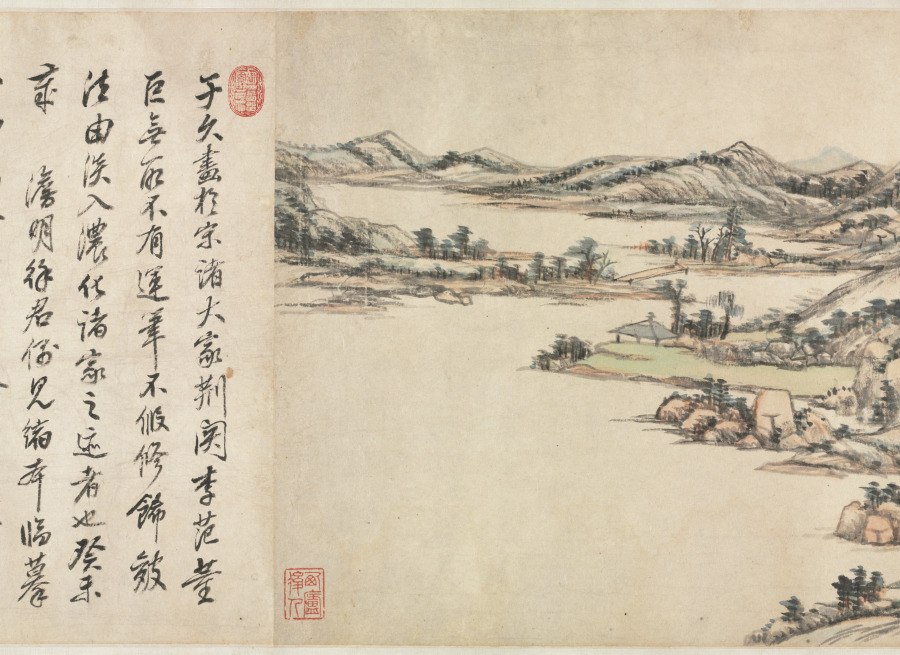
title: Green Peaks under Clear Sky: After Huang Gongwang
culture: China, Qing dynasty (1644-1911)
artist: Wang Yuanqi (Chinese, 1642–1715)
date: 1703–8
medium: handscroll; ink and light color on paper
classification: Painting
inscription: 晴巒霽翠：倣黃子久。麓臺。[印]石師道人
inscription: [印] 御書畫圖留與人看. 子久畫於宋諸大家荊、關、李、范、董、巨，無所不有。運筆不假修飾。皴法由淡入濃，化諸家之迹者也。澹明徐君偶見縮本，臨摹六幅。囑余參以富春大意，成一長卷。余夙夜在公，乘暇偶一點染。至戊子九秋告竣，閱四、五年矣。昔大癡為無用師作富春卷，七年而成，為千古鉅觀。今拙筆癡鈍。亦淹留至此。可為識者噴飯矣。王原祁題。[印]王原祁印; 麓臺 [印, 畫芯左下] 西廬後人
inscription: 3 additional colophons and 15 additional seals: 1 colophon and 9 seals of Yang Shicong 楊士驄 (b. 1870); 1 colophon of Wu Hufan 吳湖帆 (1894–1968); 1 colophon and 1 seal of Wu Mei (20th c.); 5 seals of Cheng Qi 程琦 (1911–1988).